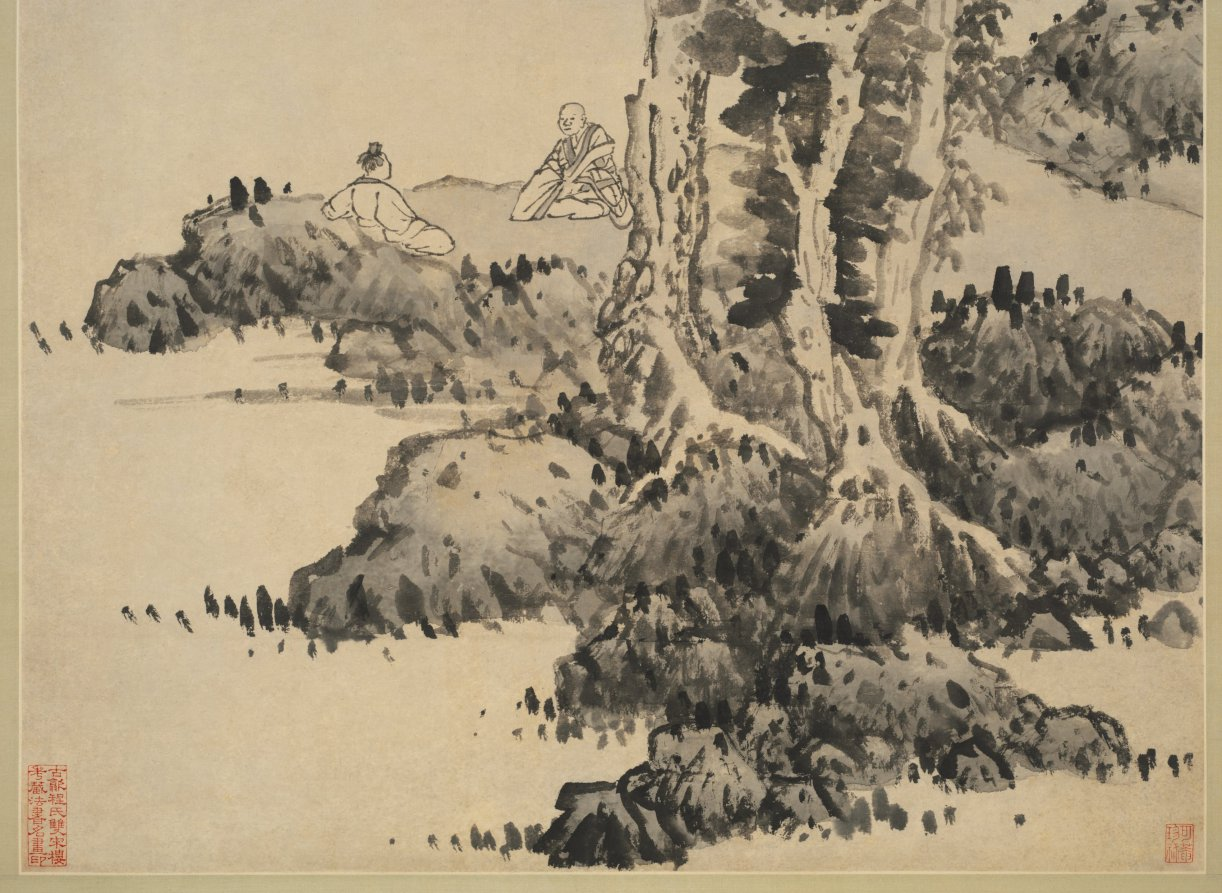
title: Zhi and Xu's Pure Conversation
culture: China, Ming dynasty (1368–1644)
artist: Lan Ying (Chinese, 1585–after 1664)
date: 1643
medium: Hanging scroll; ink on paper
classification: Painting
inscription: 六朝多奇人，寄隱玄與釋。/ 支遁許道士，情意合相適。/ 長松古巖下，高譚對終日。/ 大志擲流水，好句聯袂覓。/ 世事世之外，千秋我自識。 五雲禪師道古行潔，與世無涉。喜山水，喜文 墨。至老神逾王。余與方外交，遂作支許清言 圖，乞為開示。 蝶叟藍瑛癸未七月杪。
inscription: 2 additional seals of Cheng Qi 程琦 (1911–1988)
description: Lan Ying’s painting is a gift to his friend, the Chan monk Wuyun, in which he depicted two sages of the Six Dynasties period: the Buddhist monk Zhidun (314–366 CE), and the Daoist priest Xu Xun (265–420 CE). Meant to be understood as an analogy of the friendship between artist and monk, the painting also offered a retreat into the past, a year before the fall of the Ming dynasty. A professional painter born in Hangzhou, Lan Ying is traditionally considered a last representative of the Zhe school. Lan wrote poetic inscriptions and interacted with the literatus Chen Jiru (1558–1639).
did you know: This painting serves as an analogy of the friendship between artist and monk.